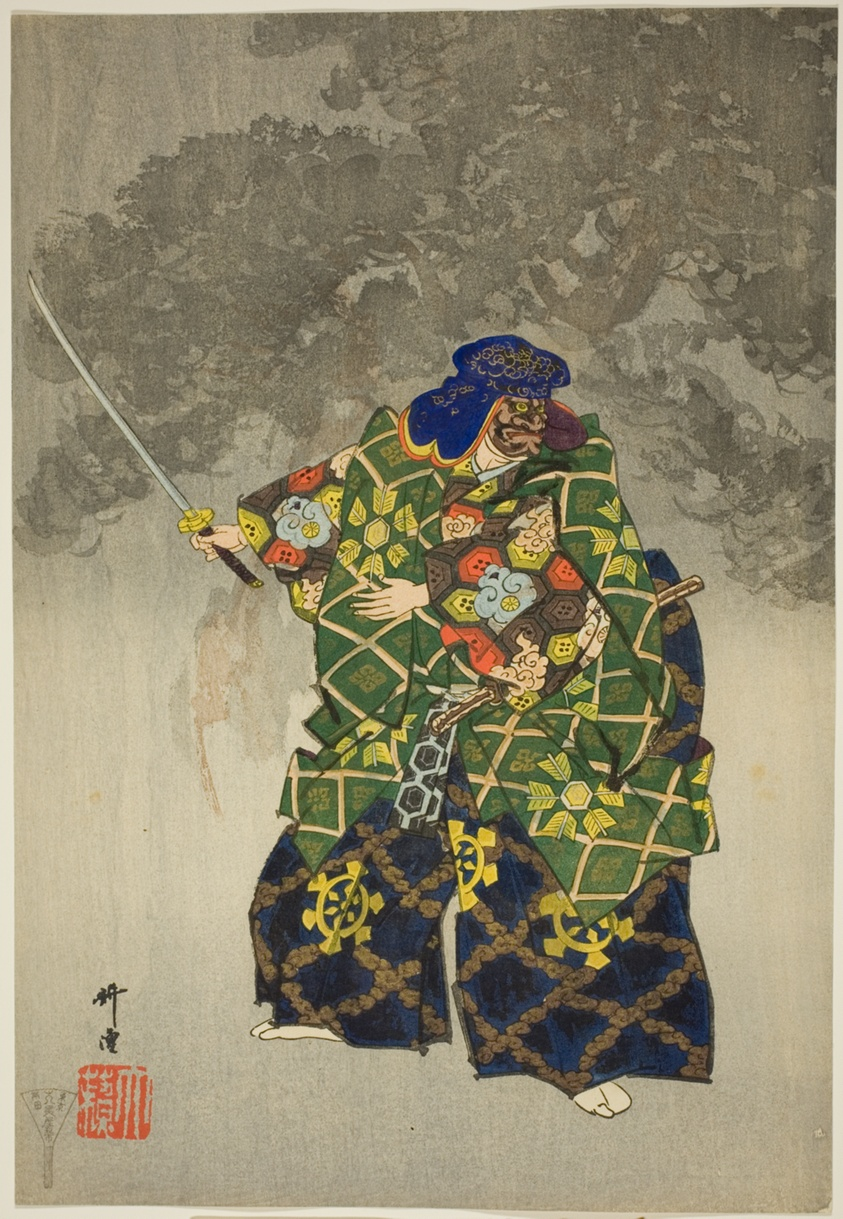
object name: Print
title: Eboshi-ori, from the series "One Hundred No Dramas (Nogaku hyakuban)"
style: Japanese (culture or style)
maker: Tsukioka Kogyo; Japanese, 1869-1927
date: 1898/1903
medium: Color woodblock print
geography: Japan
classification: woodblock print; print; asian art